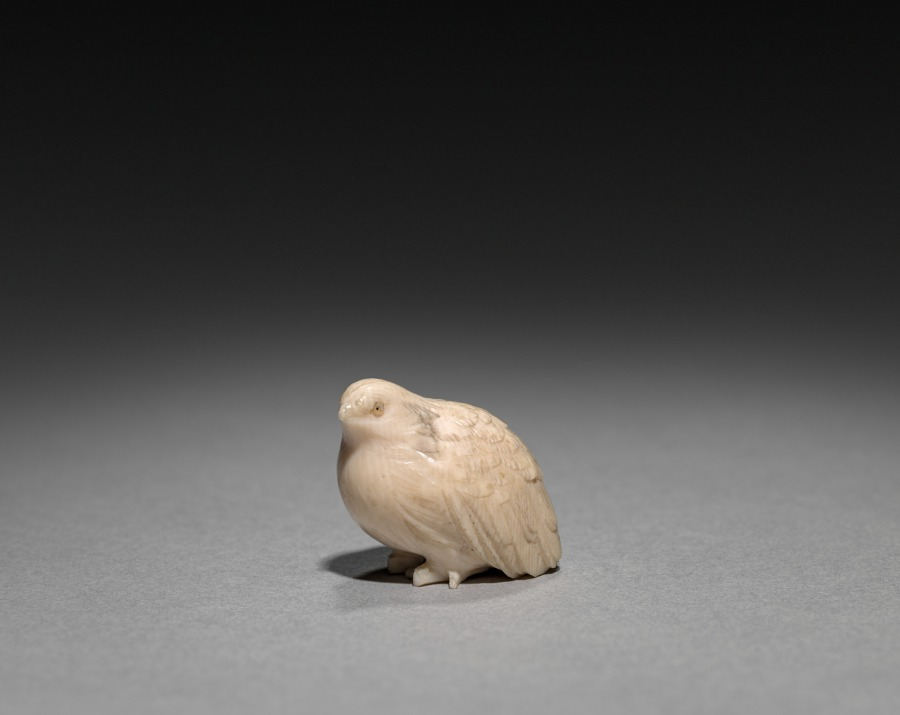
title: Quail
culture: Japan, Meiji period (1868–1912)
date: early 1900s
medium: ivory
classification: Ivory